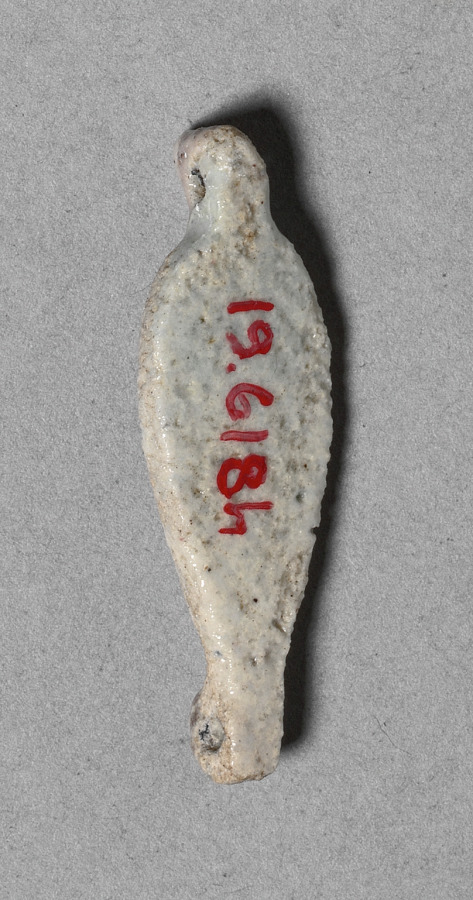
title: Petal-Shaped Bead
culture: Egypt, New Kingdom (1540–1069 BCE), Dynasty 18, reign of Amenhotep III (1390–1352 BCE)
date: c. 1391–1353 BCE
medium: faience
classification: Jewelry